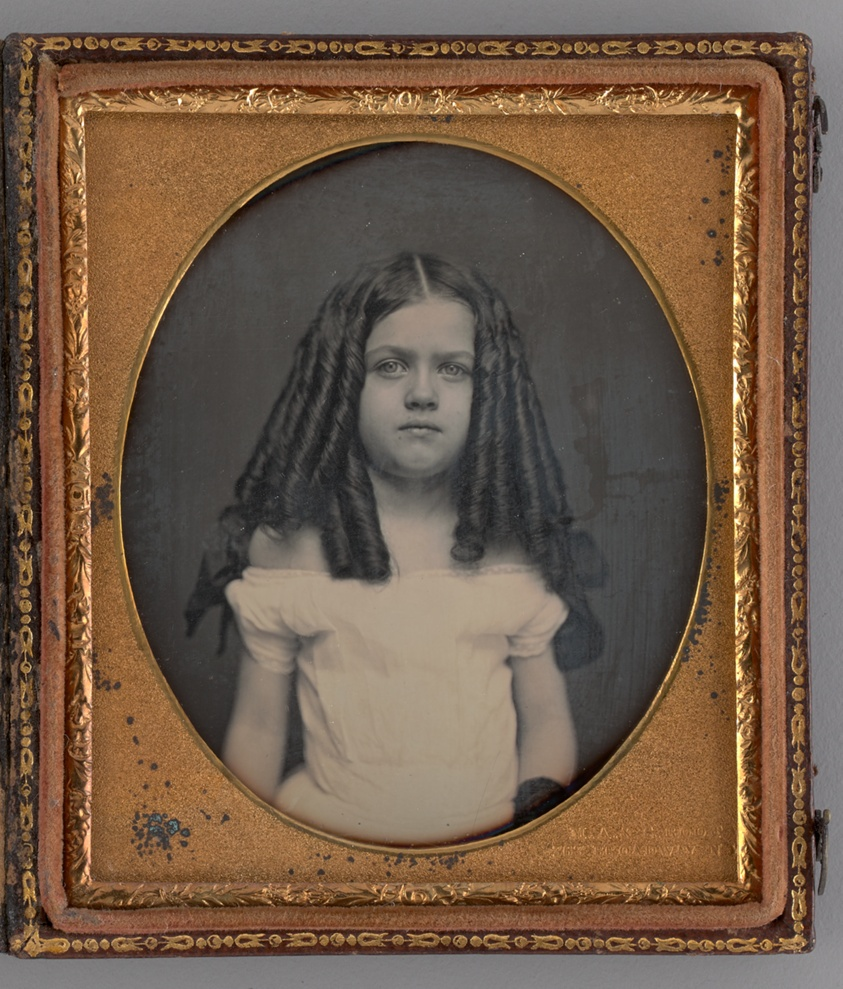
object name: Photograph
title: Untitled (Portrait of a Girl)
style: 19th century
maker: Marcus Aurelius Root & S. Root; American, 1808-1888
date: 1855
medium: Daguerreotype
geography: United States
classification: portrait; photograph; photographic process; photography; portrait; daguerreotype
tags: lundberg collection, portrait, females, female, portraits, portraits: child subject, portraits: female subject